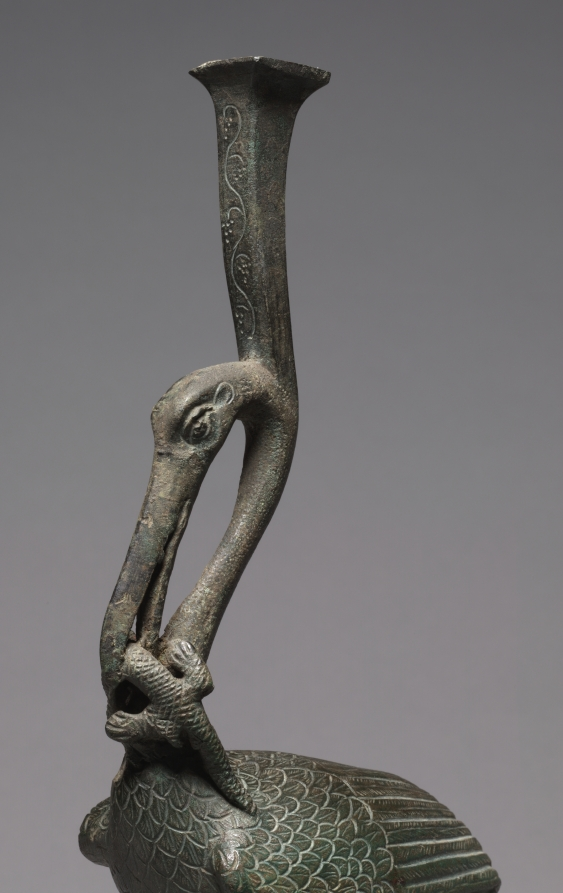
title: Ibis Eating a Lizard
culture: Italy, Rome, Roman Empire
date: 100 BCE–100 CE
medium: bronze, hollow cast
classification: Sculpture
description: The ibis is an Egyptian bird, shown here standing firmly on both legs with a lizard in its beak. The bird rests on a two-tiered circular base, and a vertical stem with incised decoration extends above the ibis’s head. While an Egyptian animal, the image of the ibis devouring a lizard became common only in the Roman world, depicted in wall paintings and seen on Barbotine ware, a type of pottery. This sculpture may be unique, however, in showing this motif in the round.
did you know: This sculpture was possibly used as a support for furniture, a candelabrum, or an incense burner.